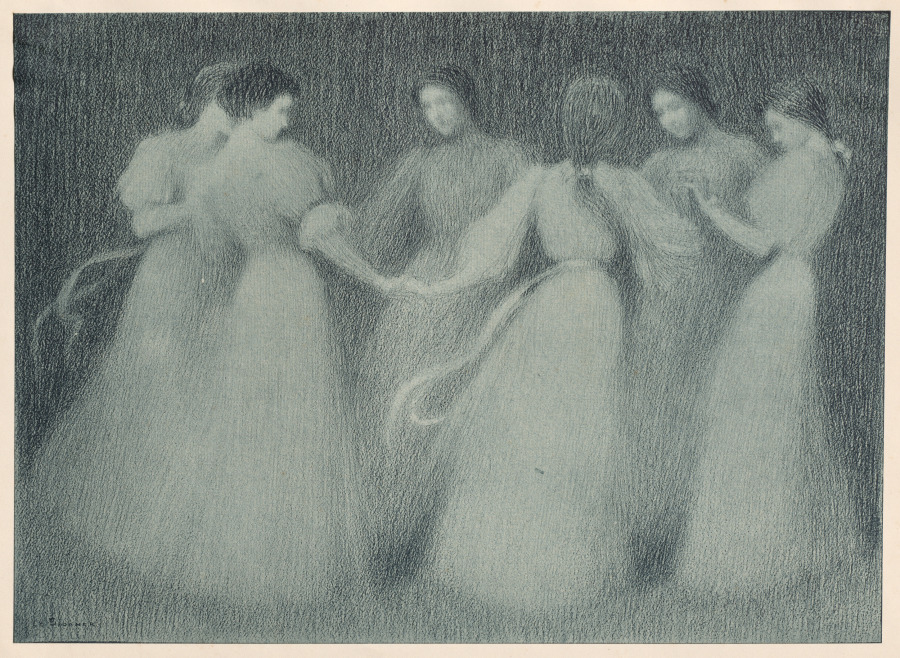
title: La Ronde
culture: France, Paris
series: L'Estampe Moderne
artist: Henri Le Sidaner (French, 1862–1939)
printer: Imprimerie Champenois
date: 1899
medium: Lithograph printed in blue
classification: Bound Volume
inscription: In plate: lower left corner of image: Le Sidaner; watermark in center of sheet: PL BAS; upper right corner of secondary support: blindstamp of l'Estampe Moderne (Lugt 2790)